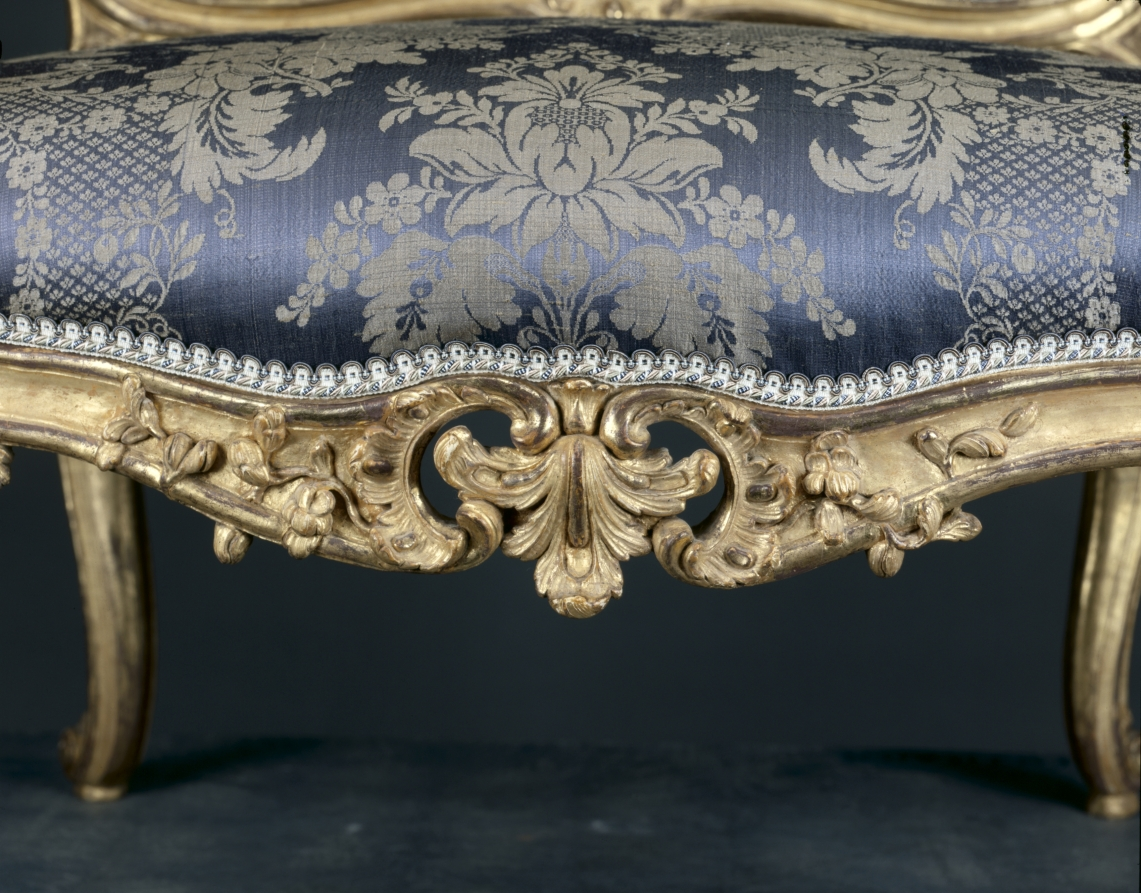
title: Armchair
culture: France, 18th century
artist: attributed to Nicolas Heurtaut (French, 1720–1771)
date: c. 1755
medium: carved and gilded wood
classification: Furniture and woodwork